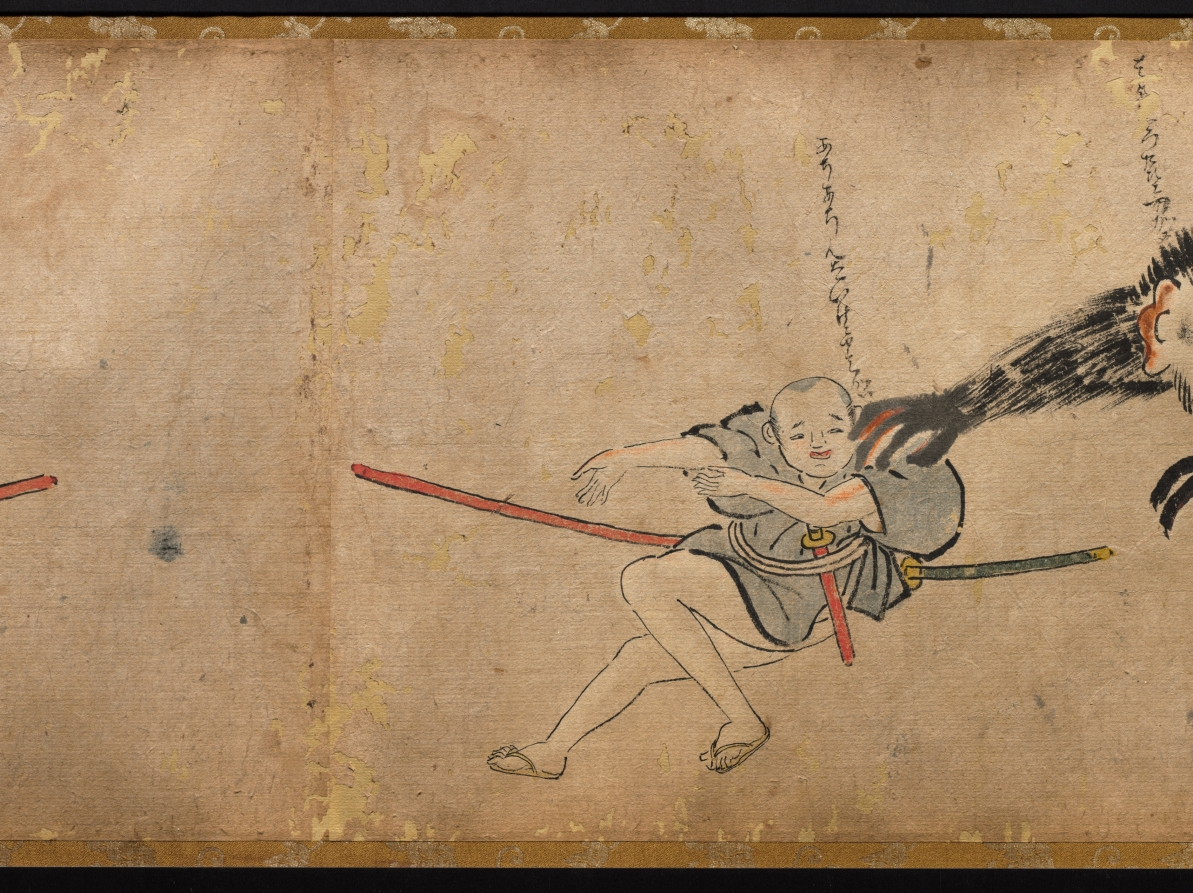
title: The Illustrated Tale of Oishi Hyōroku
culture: Japan, Edo period (1615–1868)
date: 1700s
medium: handscroll; ink and color on paper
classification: Painting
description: This incomplete handscroll illustrates part of the story of Oishi Hyoroku, a young man tasked with battling fox apparitions who were creating problems in his town. In other extant versions of the scroll, the story is set in the fall of 1624 in Kagoshima in southern Japan. Throughout the story, Hyoroku is tricked and terrified by the foxes that shift their shapes into a variety of monstrous phantoms. After repeated humiliations, he eventually captures two of the foxes. In this version, colloquial texts that function like text blurbs in comics appear throughout the scroll, but the main text is missing.